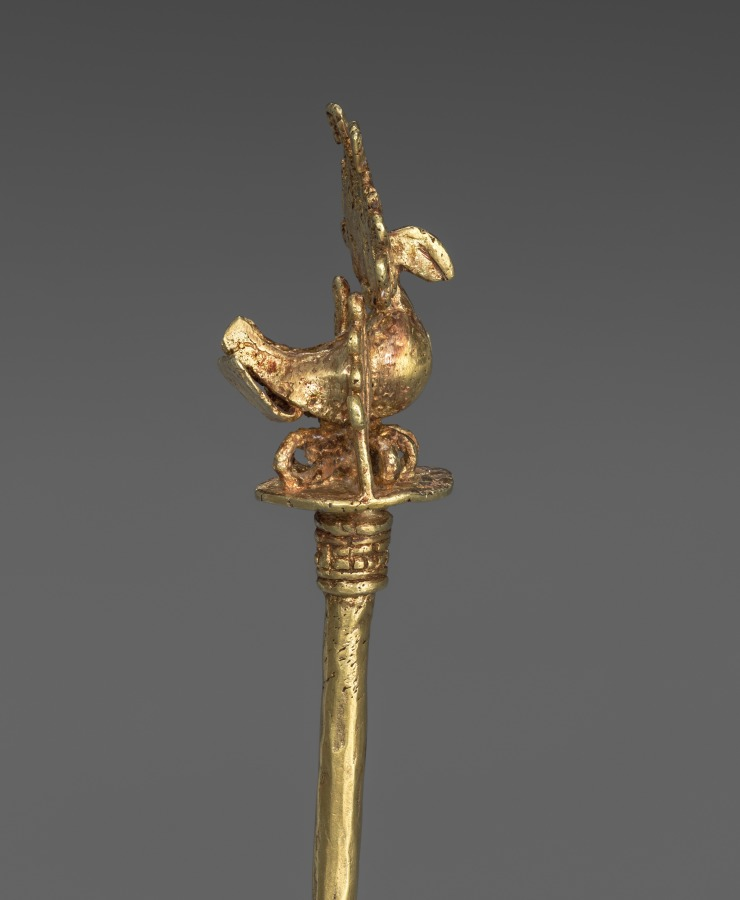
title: Lime Dipper or Pin with Owl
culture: Isthmian Region (Colombia), Calima, Yotoco period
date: 1–800 CE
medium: gold, cast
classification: Metalwork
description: An engaging miniature owl forms the finial of this dipper, which was used during coca-chewing rituals. Typically, coca leaves were chewed into a quid; then, with a dipper, lime made from powdered seashells was added to the quid to enhance the leaves' gentle stimulating effects. Contemporary natives regard coca as crucial to creating both social camaraderie and communion with supernatural forces; the same may have been true in the past.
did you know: Chewing coca leaves remains popular among indigenous communities in the Andean region.